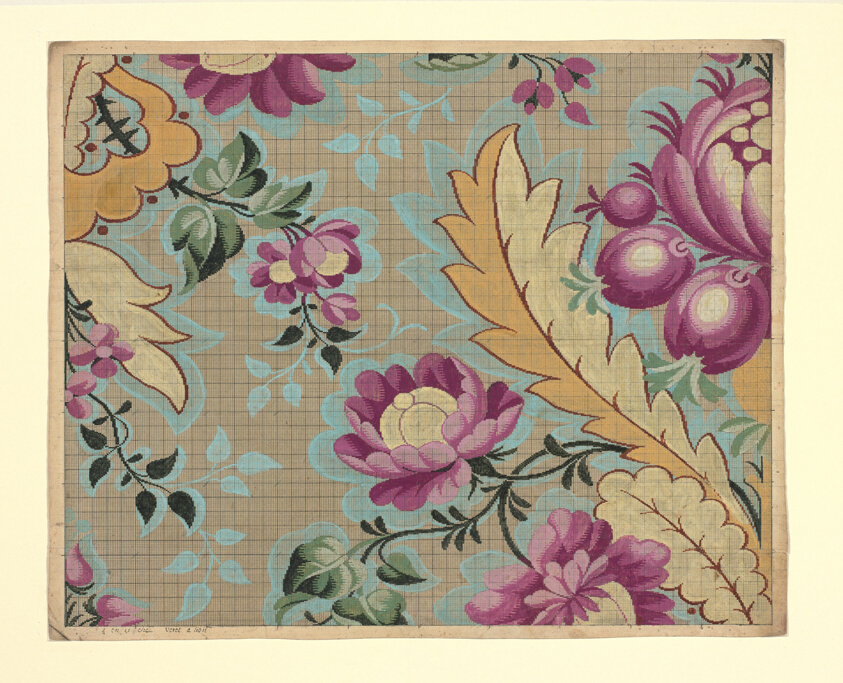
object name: Drawing and Watercolor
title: Mise-en-carte (Point-paper)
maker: Designed Germain Frères; France, Lyon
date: 1760/90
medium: Ink and gouache on hand drawn graph paper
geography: France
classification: textile; accessory - paper design